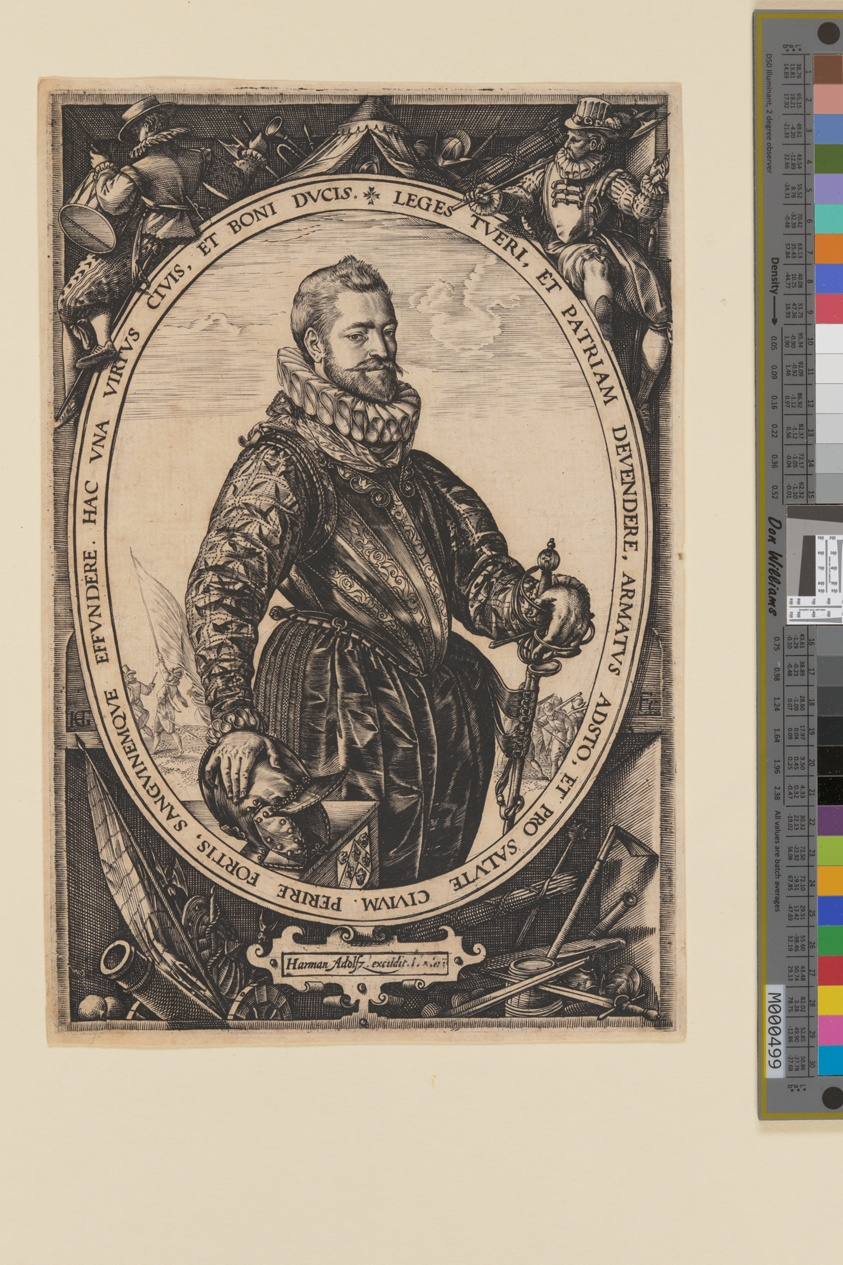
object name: Print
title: Portrait of Jacques de la Faille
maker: Hendrick Goltzius (Dutch, 1558–1617)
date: 1580, printed after 1607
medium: Engraving on ivory laid paper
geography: Netherlands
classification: engraving; paper; print; prints and drawing